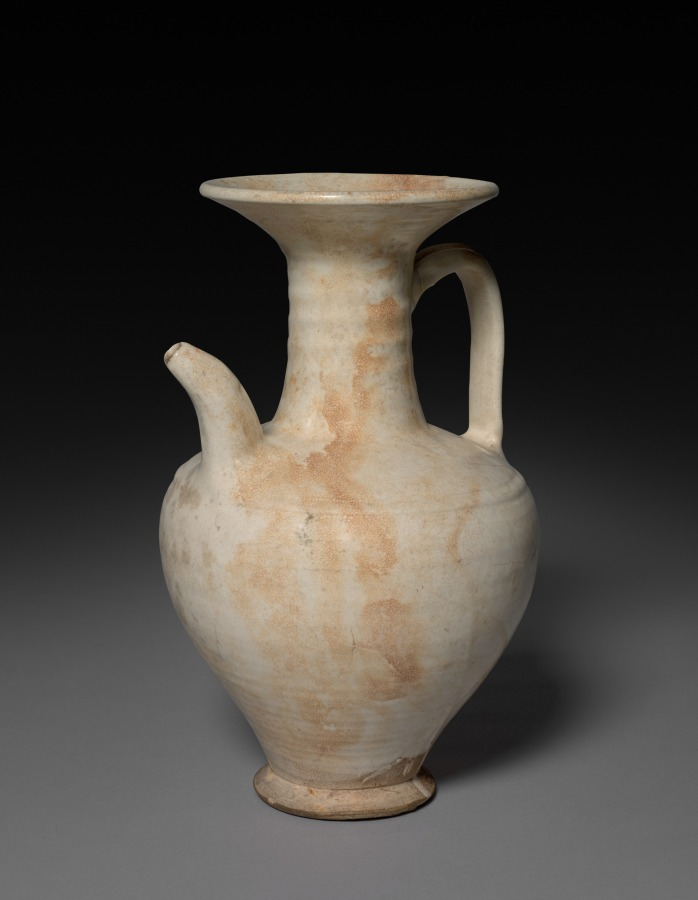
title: Ewer: Cizhou ware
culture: China, Northern Song dynasty (960-1127)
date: 1105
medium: buff stoneware with underglaze slip coating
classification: Ceramic